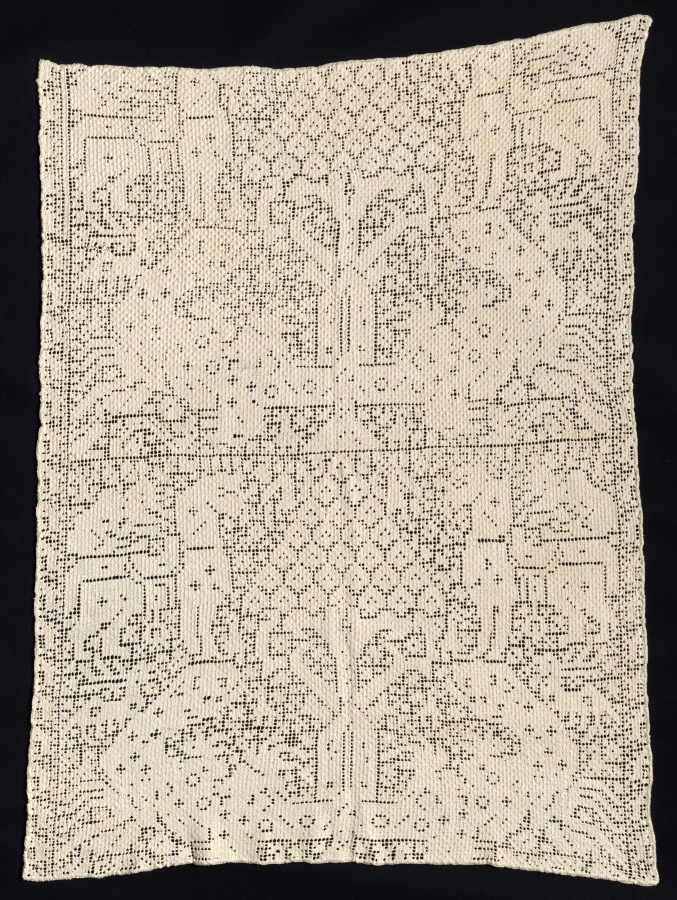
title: Panel with a Pattern of Trees and Unidentified Animals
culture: Spain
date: 1800s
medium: Bleached linen (est.): needle lace, filet/lacis (knotted ground and darned in two directions)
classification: Lace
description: The darning, or area of woven pattern, on these two attached panels is much thicker than the ground. In the center, a tree is flanked by four-legged animals, perhaps horses, lions, or griffins.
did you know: The word lace derives from the Latin laqueus, meaning noose.